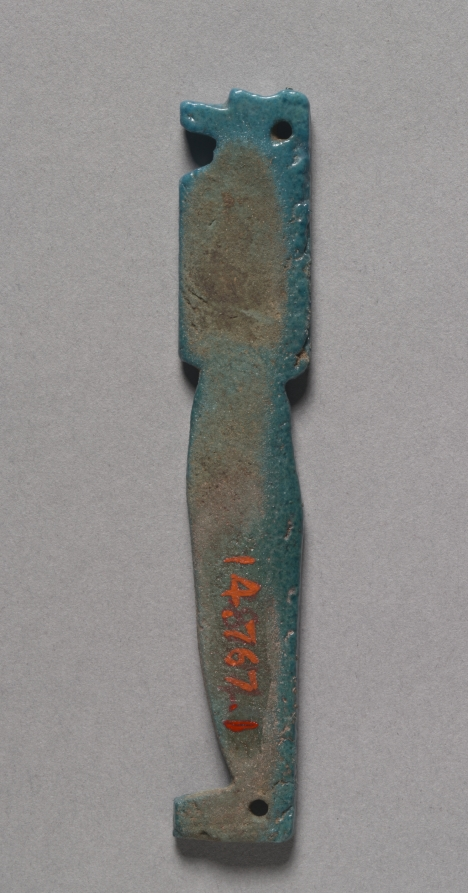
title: Son of Horus Amulet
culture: Egypt, Late period (715–332 BCE), Dynasty 26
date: 664–525 BCE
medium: bright turquoise faience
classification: Amulets